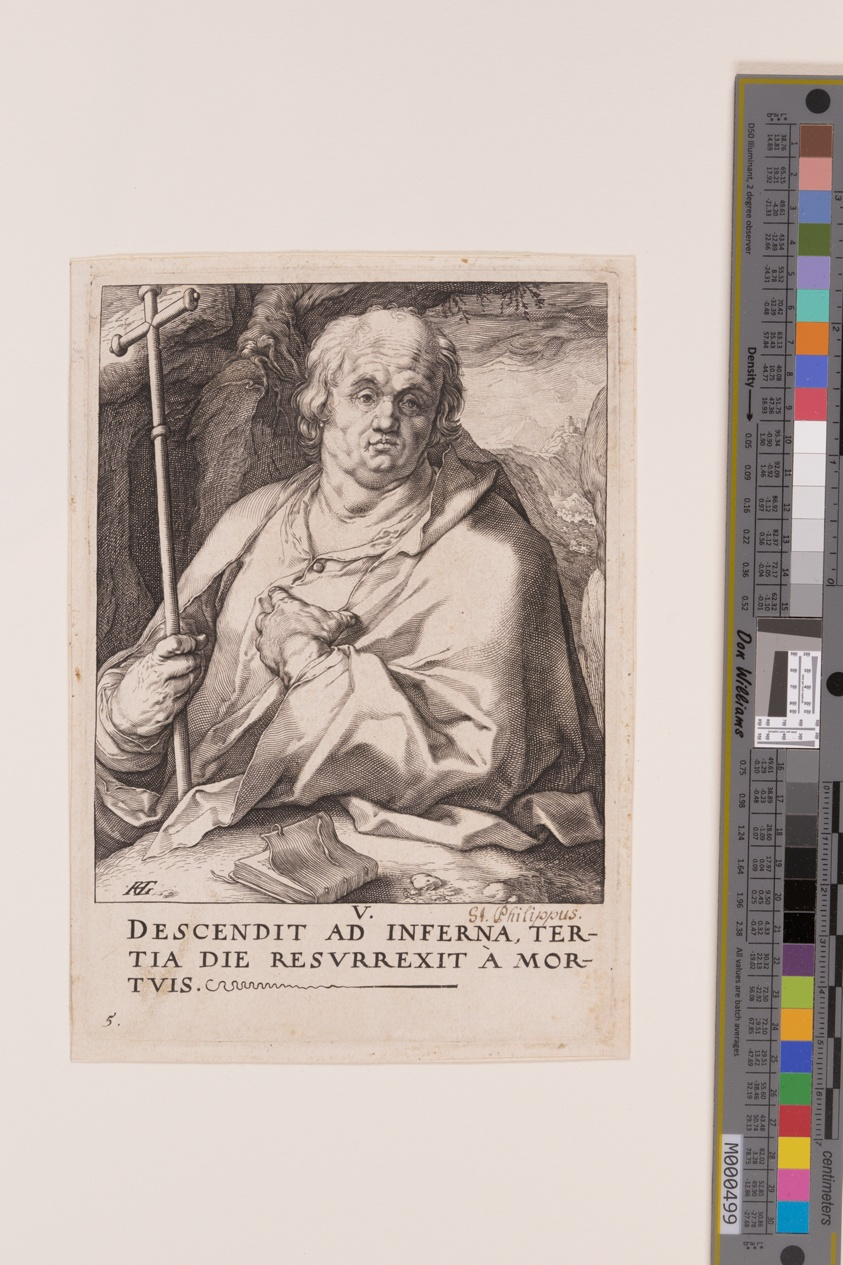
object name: Print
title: St Philip, from Christ, the Apostles and St Paul with the Creed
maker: Hendrick Goltzius (Dutch, 1558–1617)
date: 1589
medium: Engraving on ivory laid paper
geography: Netherlands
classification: engraving; paper; print; prints and drawing